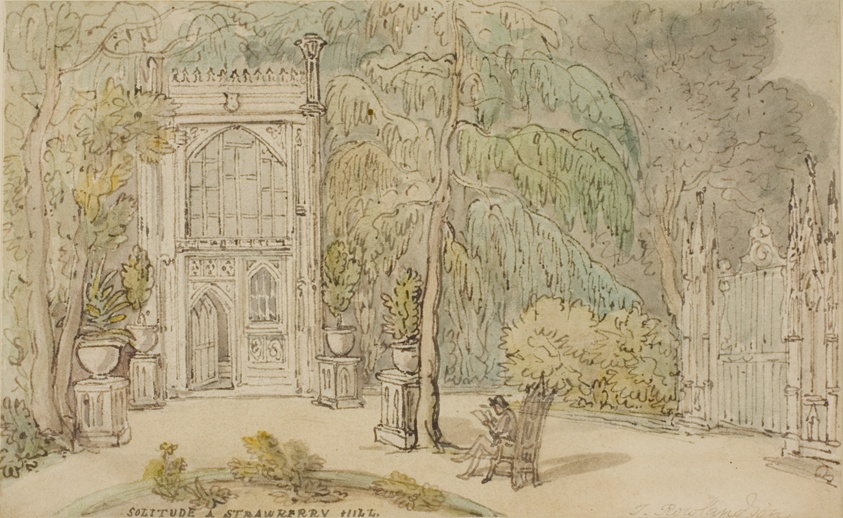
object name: Drawing and Watercolor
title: Solitude at Strawberry Hill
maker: Thomas Rowlandson (English, 1756-1827)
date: c. 1822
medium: Pen and brown ink, with brush and watercolor, on cream wove paper, laid down on board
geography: England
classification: watercolor; drawings (visual works); prints and drawing